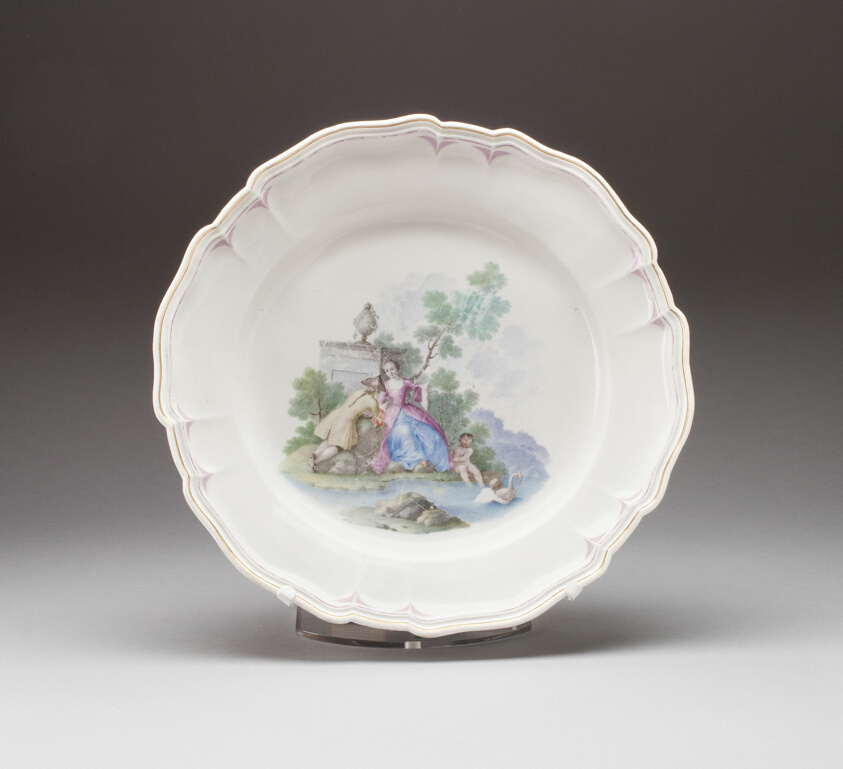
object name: Ceramics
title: Plate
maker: Buen Retiro Porcelain Factory (Spanish, 1759-1808)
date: c. 1765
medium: Hard-paste porcelain and polychrome enamels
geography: Buen Retiro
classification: plate (general, dish); tableware; dish (vessel); porcelain; european decorative arts; ceramics